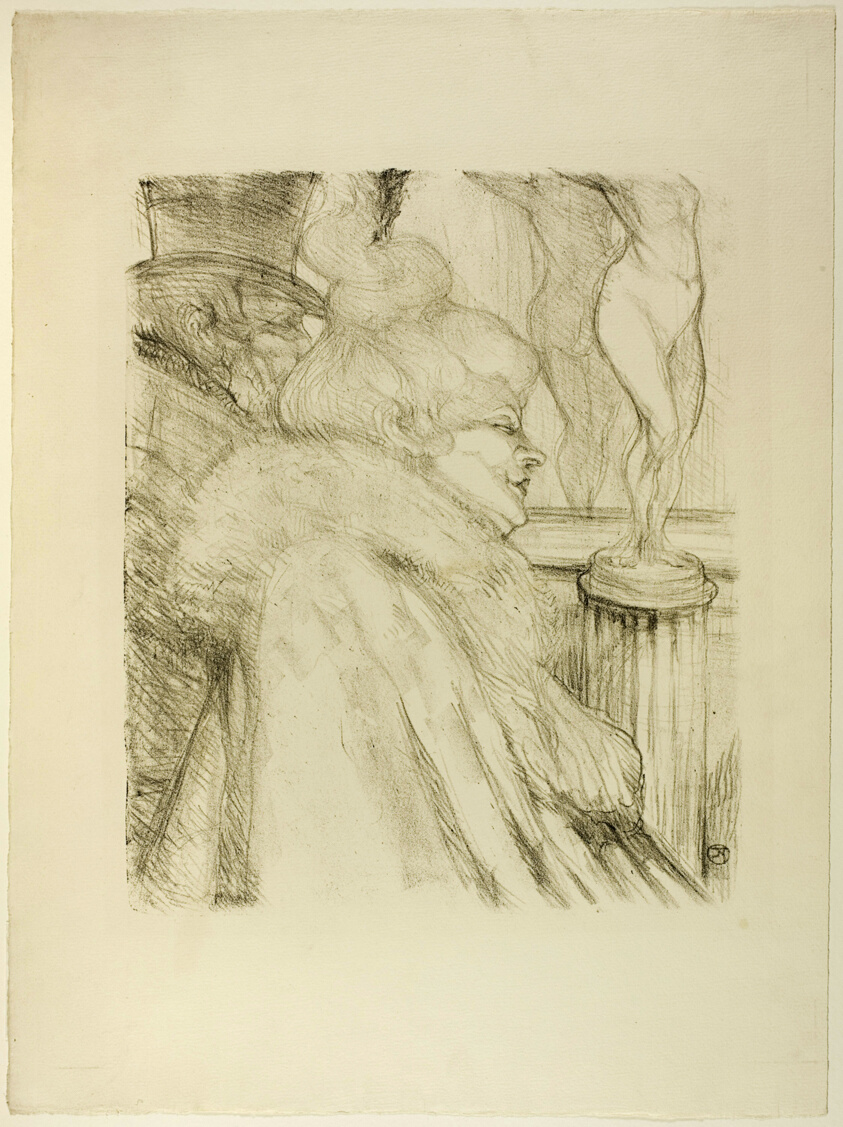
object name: Print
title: Leaving the Theater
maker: Henri de Toulouse-Lautrec (French, 1864-1901)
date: 1896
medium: Lithograph in black on cream wove paper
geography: France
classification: lithograph; print; prints and drawing